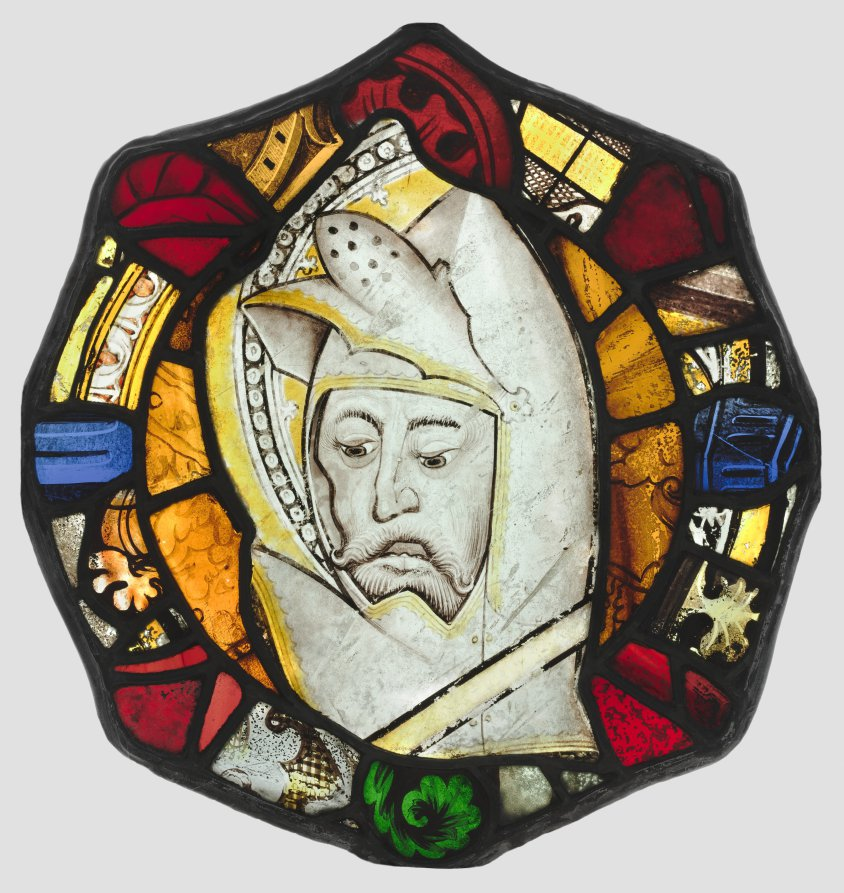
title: Saint George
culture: England, 15th century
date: c. 1440–1450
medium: white glass with silver stain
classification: Glass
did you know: This element of a stained glass window depicts Saint George, the saintly knight who was thought to have killed a dragon terrorizing a Libyan city.